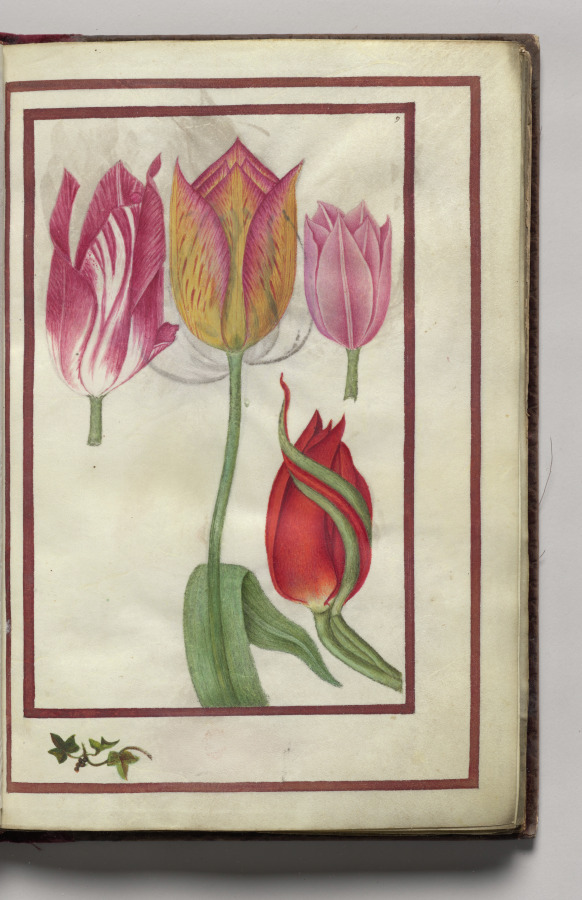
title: Tulips, folio 5 (recto), from Florilegium (A Book of Flower Studies)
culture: France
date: 1608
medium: watercolor, ink, silver, and gold over occasional traces of pencil, on vellum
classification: Bound Volume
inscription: Dated: Poitiers 1608 (on frontispiece) Signed: On frontispiece in black ink, lower right: Van Kuyk Notation on drawing: Frontispiece: in pencil, lower margin: * élève de Van Kessel, peintre flammand (* in pencil also appears in front of Van Kuyk's name).